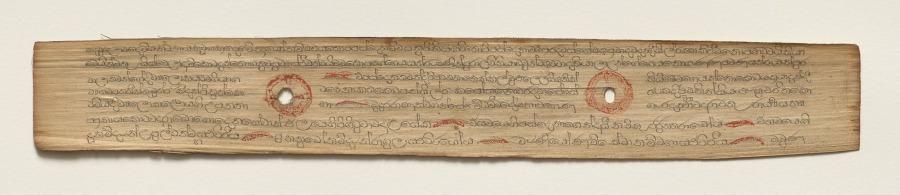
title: Leaf from a Buddhist Manuscript (verso)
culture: Sri Lanka, Singhalese, Late 17th century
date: c. 1700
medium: fiber paper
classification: Manuscript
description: Palm leaf material is still used for manuscripts in Sri Lanka. The palm leaves are prepared first by boiling them, drying them in the sun, and then rubbing them with oils. Scribes then use a metal stylus to incise the text. Then charcoal powder is wiped across the pages, filling in only the inscribed lines.